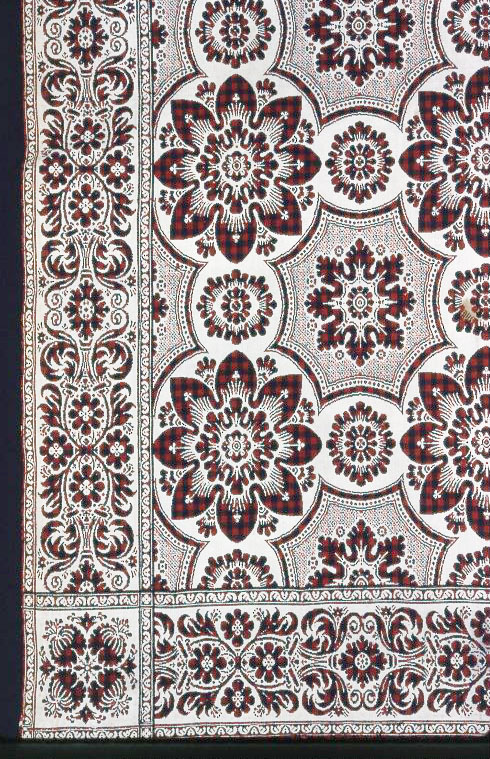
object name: Textile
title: Coverlet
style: 19th century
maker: United States, New York, Genessee County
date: 1840/50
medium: Cotton and wool, woven on loom with Jacquard attachment; two loom widths joined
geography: New York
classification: weaving - coverlet; coverlet; weaving; textile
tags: medallions, foliage, vines, flowers, coverlet